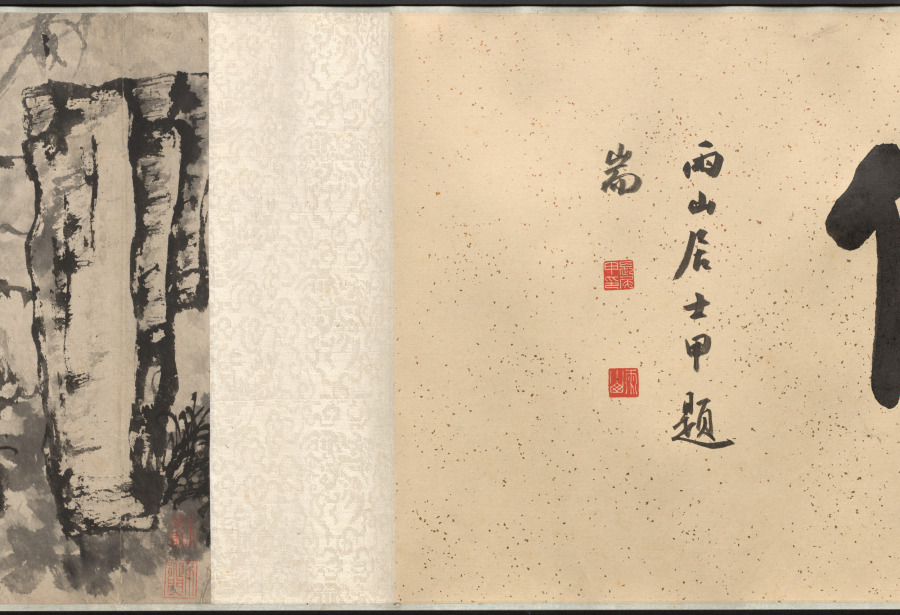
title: Rocks, Orchid, and Bamboo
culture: China, Qing dynasty (1644-1911)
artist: Shitao (Chinese, 1642–1707)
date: 1662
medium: handscroll; ink on paper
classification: Painting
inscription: Title colophon in four characters with signature and two seals on gold-flecked paper.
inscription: Artist's signature, inscription (with date of 1662), five seals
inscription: Colophon with two seals.